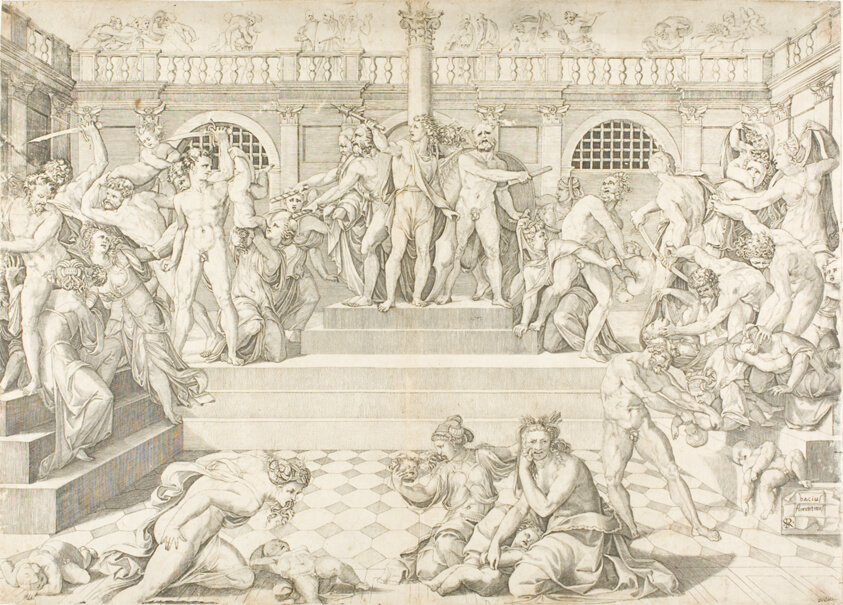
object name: Print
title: The Massacre of the Innocents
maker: Marco Dente da Ravenna (Italian, about 1486–1527); after Baccio Bandinelli (Italian, 1493-1560)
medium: Engraving on paper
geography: Italy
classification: engraving; print; prints and drawing